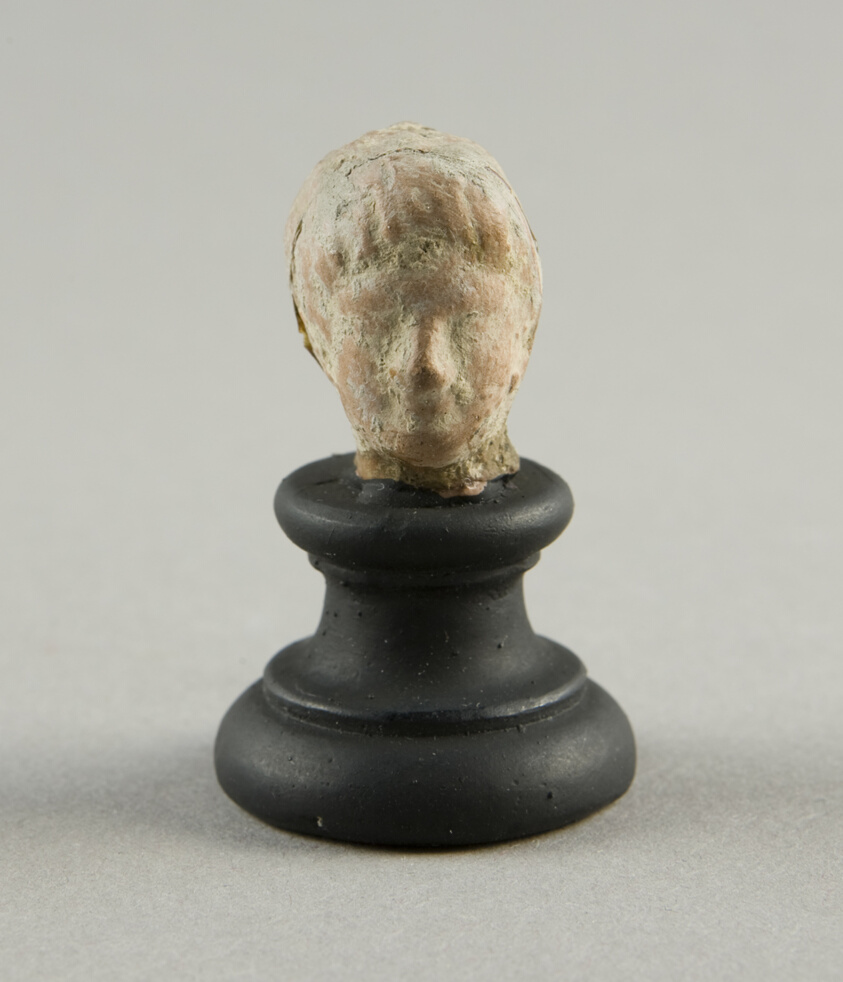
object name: Sculpture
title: Head of a Man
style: greek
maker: Greek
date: 4th-3rd century BCE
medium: terracotta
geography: Greece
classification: earthenware; ceramics; sculpture; ancient art